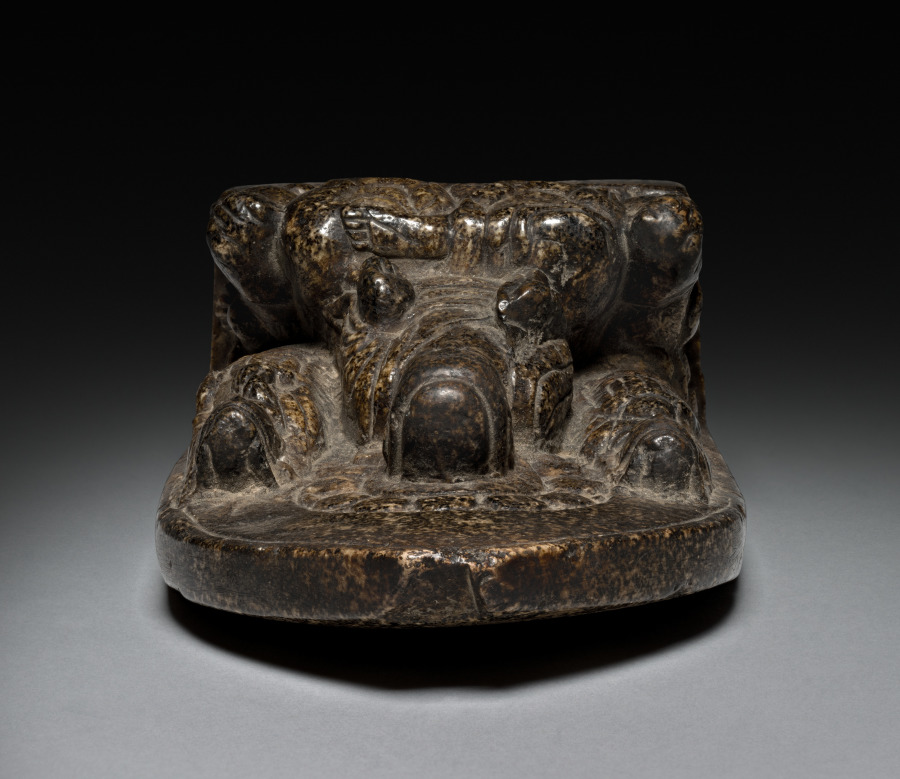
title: Buddha Triad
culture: China, Northern Dynasties period (386–581 CE), Northern Zhou (557-581)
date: 568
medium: stone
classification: Sculpture